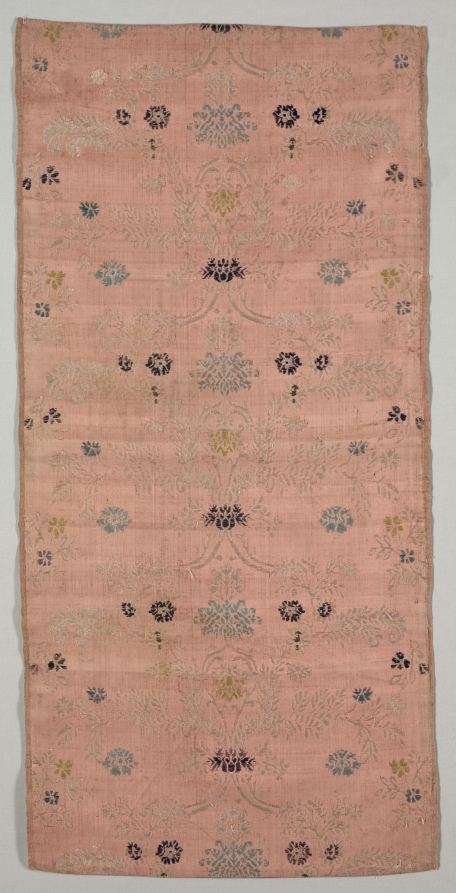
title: Length of Silk Cloth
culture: France or Italy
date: 1600–1800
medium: plain compound cloth; silk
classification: Textile